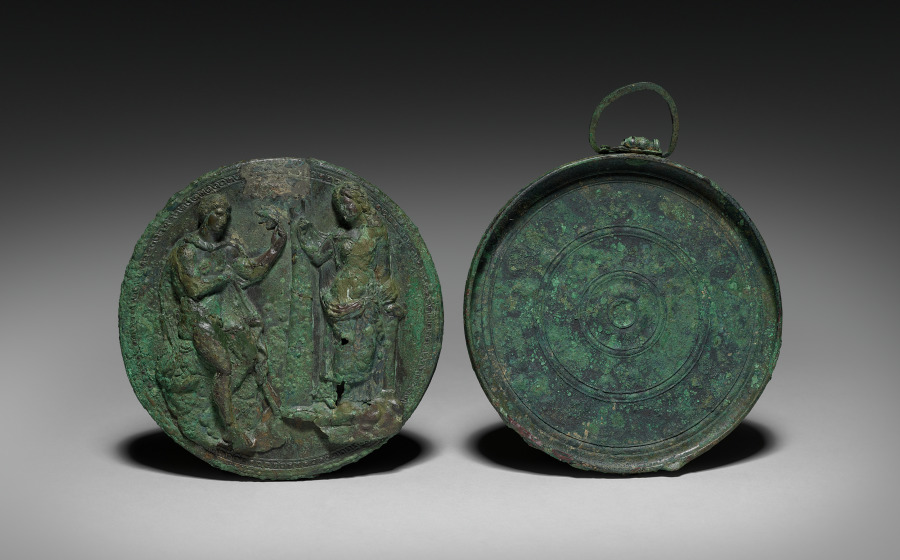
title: Mirror Case with Cover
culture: Greece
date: 300s BCE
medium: bronze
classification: Metalwork